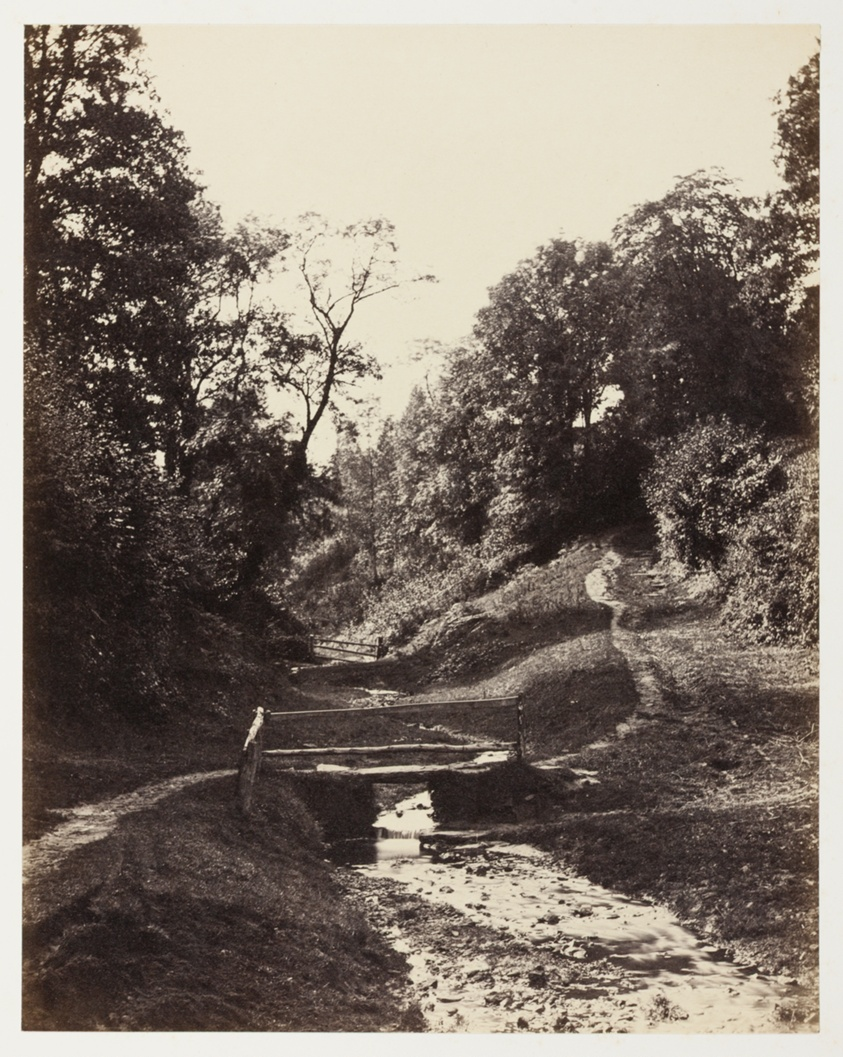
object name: Photograph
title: Scene near Godalming, Surrey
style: 19th century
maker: Alfred Rosling (English, 1802–1880s)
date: c. 1856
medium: Albumen print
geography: England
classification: albumen silver print; photographic process; photography; photograph